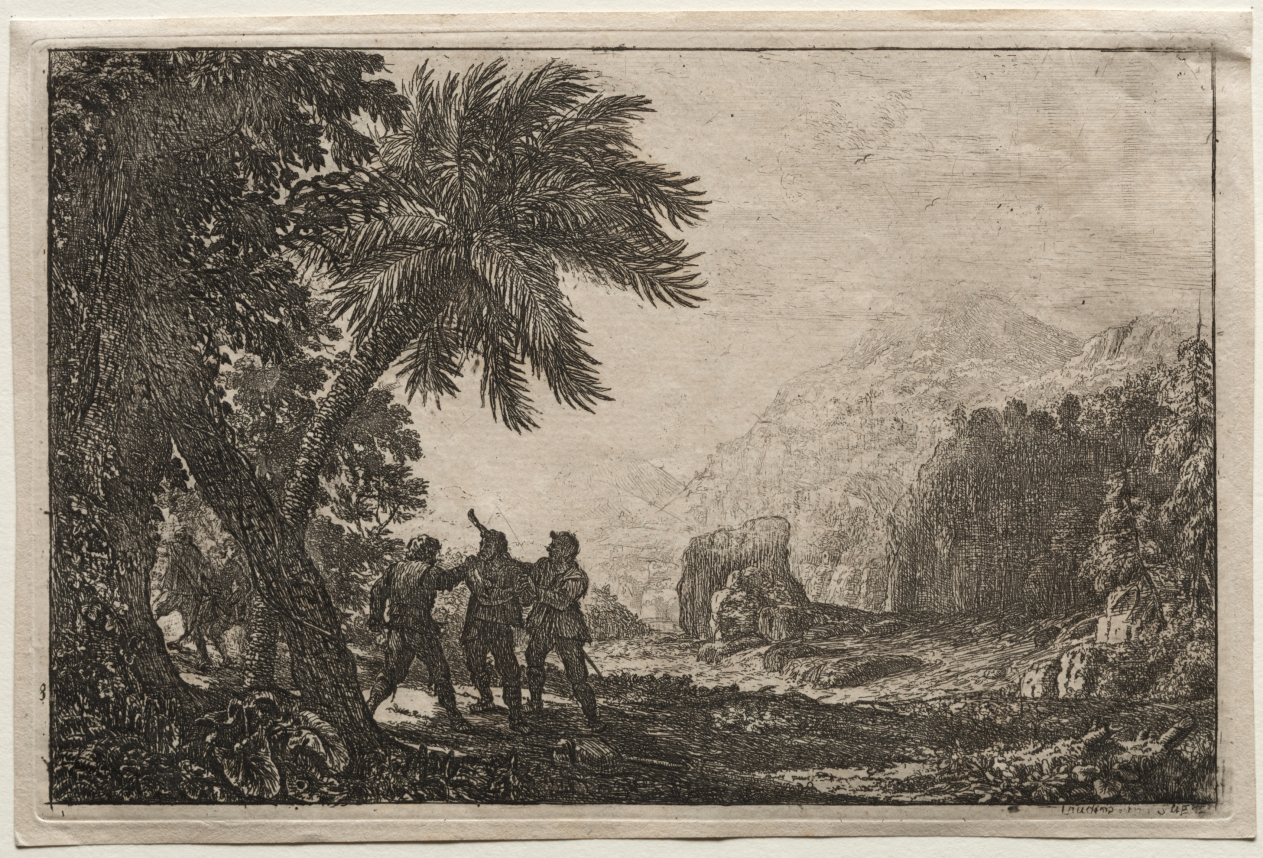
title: Landscape with Brigands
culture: France, 17th century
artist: Claude Lorrain (French, 1604–1682)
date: 1633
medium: etching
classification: Print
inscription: in plate, lower left: E. Detaille